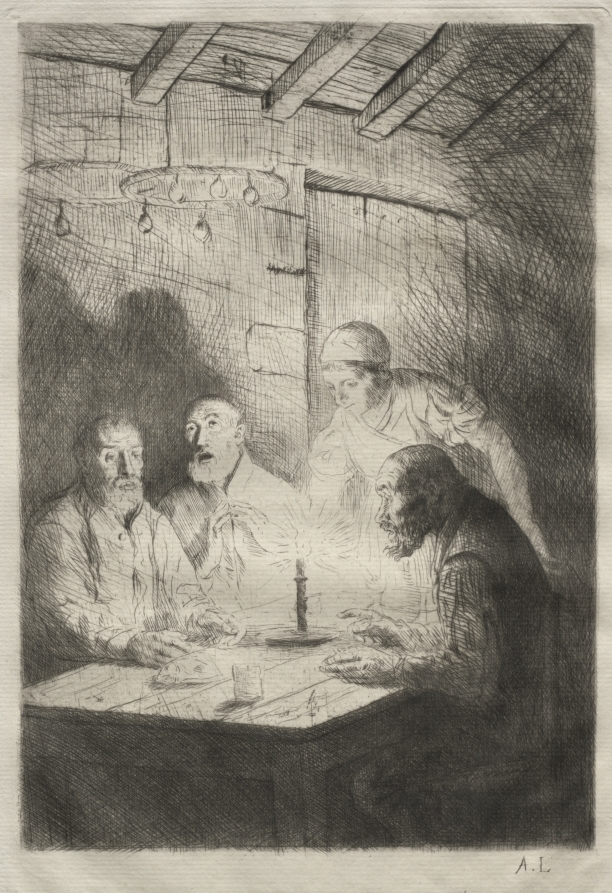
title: Le Souper chez misère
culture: France, 19th century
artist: Alphonse Legros (French, 1837–1911)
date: c. 1857–1911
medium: drypoint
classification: Print